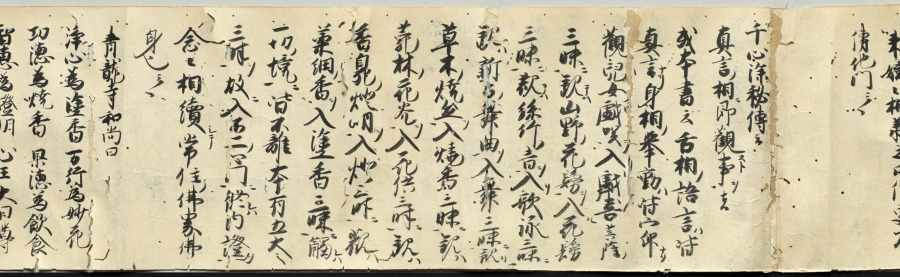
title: Scroll of Miscellaneous Notes written on a Calendar by Priest Seigen (recto)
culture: Japan, Kamakura period (1185–1333)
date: c. 1200–1231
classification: Manuscript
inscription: bears miscellaneous notes written by Priest Seigen.